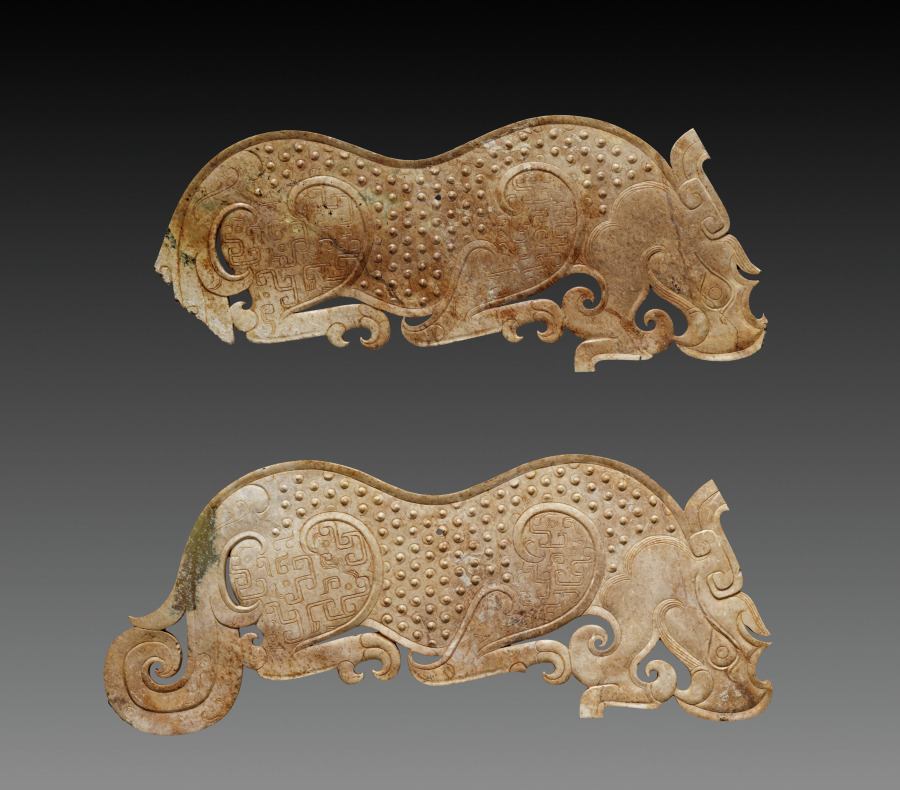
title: Pair of Jade Plaques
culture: China, Henan province, Eastern Zhou dynasty (770–256 BCE), Warring States period (475–221 BCE)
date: 475–221 BCE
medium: nephrite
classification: Jade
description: This beautiful pair of late Eastern Zhou openwork jade plaques illustrate a level of creativity and technical achievement that was unequaled before or since. Taking the shape of a pair of fantastic creatures, they are at once tiger-like, rhino-like, and dragon-like. Their strong silhouettes are marked with shallow relief bands, and their subtly swelling embellished surfaces are finished to the same degree on both sides.